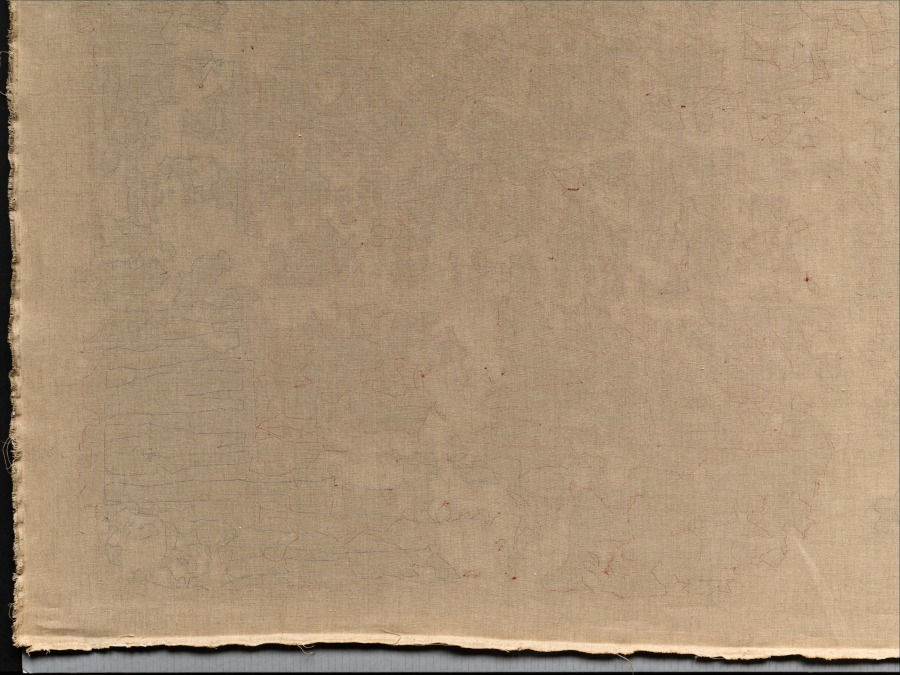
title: Fragment of a Large Hanging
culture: Egypt, Antinoë, Byzantine period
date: 500s CE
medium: tapestry weave (with plain tabby borders): wool and linen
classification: Textile